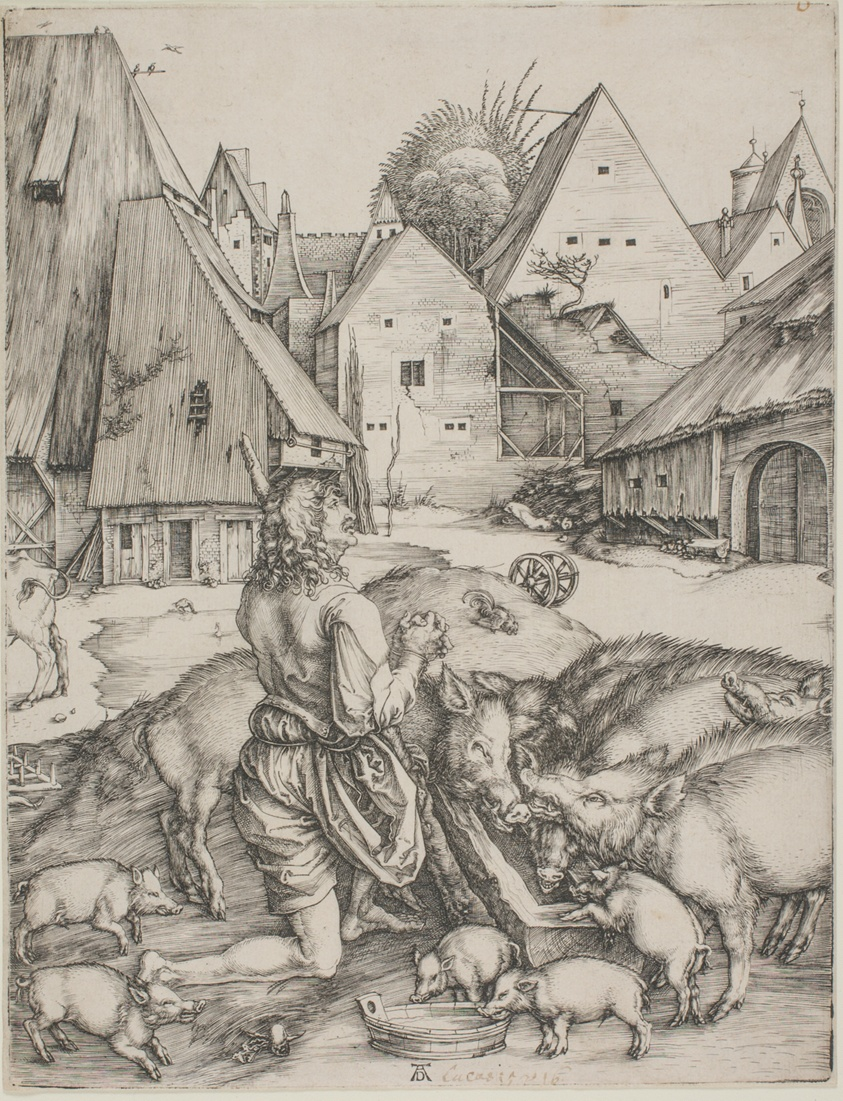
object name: Print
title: The Prodigal Son Amid the Swine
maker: Albrecht Dürer (German, 1471-1528)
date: c. 1496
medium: Engraving in black on ivory laid paper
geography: Germany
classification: engraving; print; prints and drawing; paper